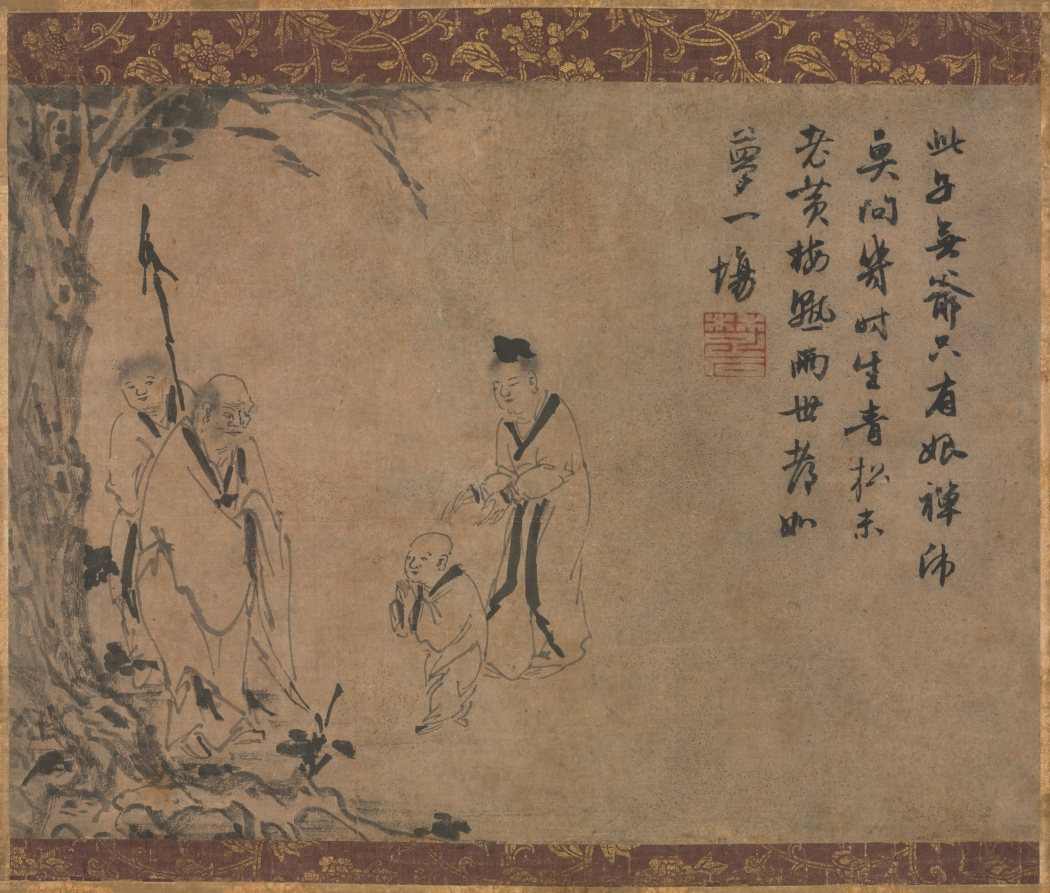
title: The Second Coming of the Fifth Patriarch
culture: China, Yuan dynasty (1271-1368)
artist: Yintuoluo (Chinese, c. 1285-c. 1355)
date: c. mid-1300s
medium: section of a handscroll mounted as a hanging scroll, ink on paper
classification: Painting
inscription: [印] 人言洞裡桃花源，未必人間有此枝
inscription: 此子無爺只有娘，禪師莫問幾時生。 青松未老黃梅飄，兩世都如夢一場。 [印] 楚石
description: A small boy, accompanied by his mother, is closing his hands in greeting to an old monk who has a young attendant standing behind him. Scholars believe the scene is a meeting between the fourth patriarch of Chan Buddhism, Daoxin 道信, and the little boy, who was the reincarnation of an old monk named Zaisong daozhe 栽松道者 (Pine Planter). They had encountered before, during which Daoxin advised the Pine Planter to endure a reincarnation as he was too old to reach enlightenment. This painting is done by Yintuoluo, an artist renowned for his simple and unadorned style.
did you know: This painting is just a section of a handscroll that has been remounted as a hanging scroll.